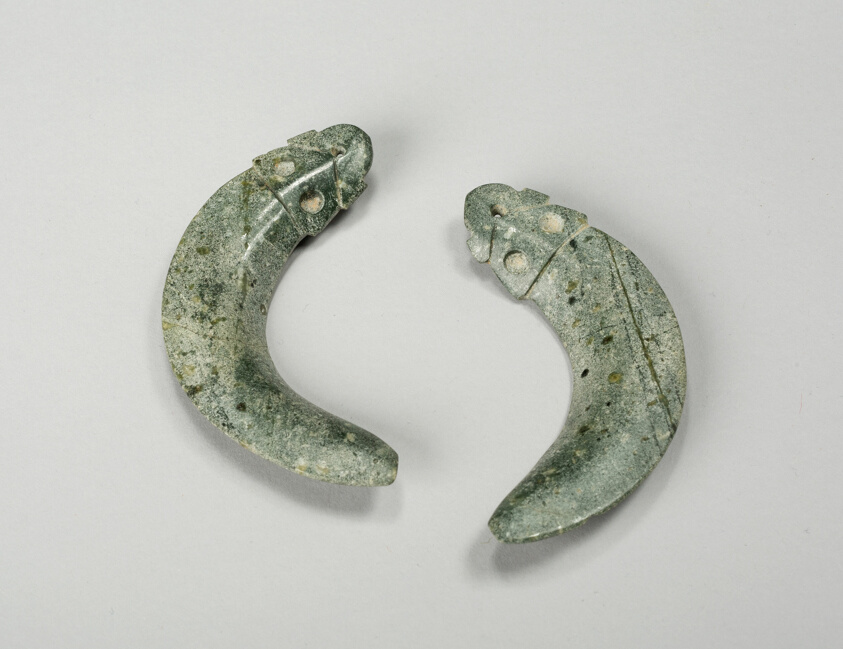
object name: Costume and Accessories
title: Pair of Earrings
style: colima, mesoamerican, Pre-Columbian, americas, Arts of the Americas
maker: Colima (Colima, Mexico)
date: 200 BCE–200 CE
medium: Stone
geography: Colima state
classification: stone; art of the americas; jewelry; costume